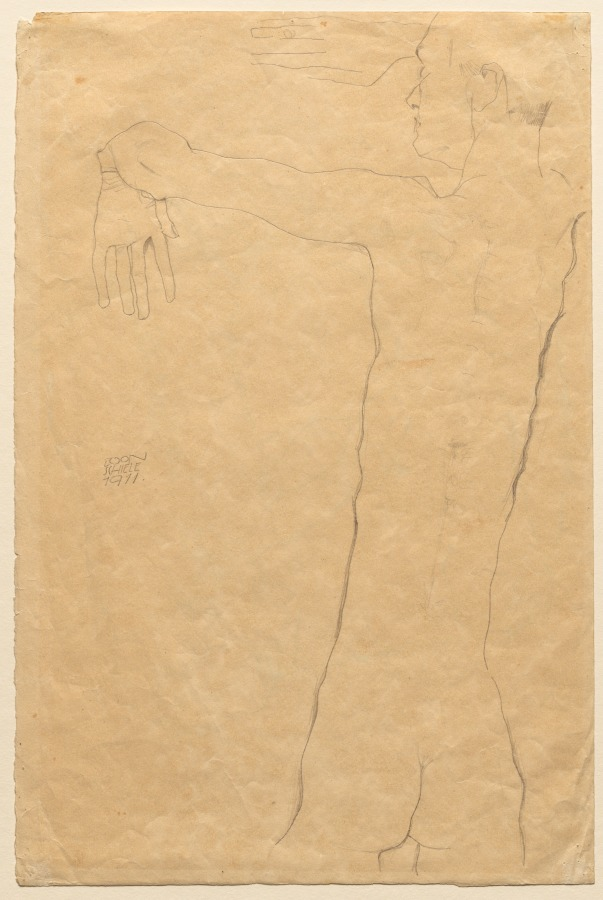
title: Nude Man with Raised Arms (recto) Seated Man (verso)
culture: Austria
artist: Egon Schiele (Austrian, 1890–1918)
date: 1911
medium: graphite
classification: Drawing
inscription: signed, left center, in graphite: EGON / SCHIELE / 1911.